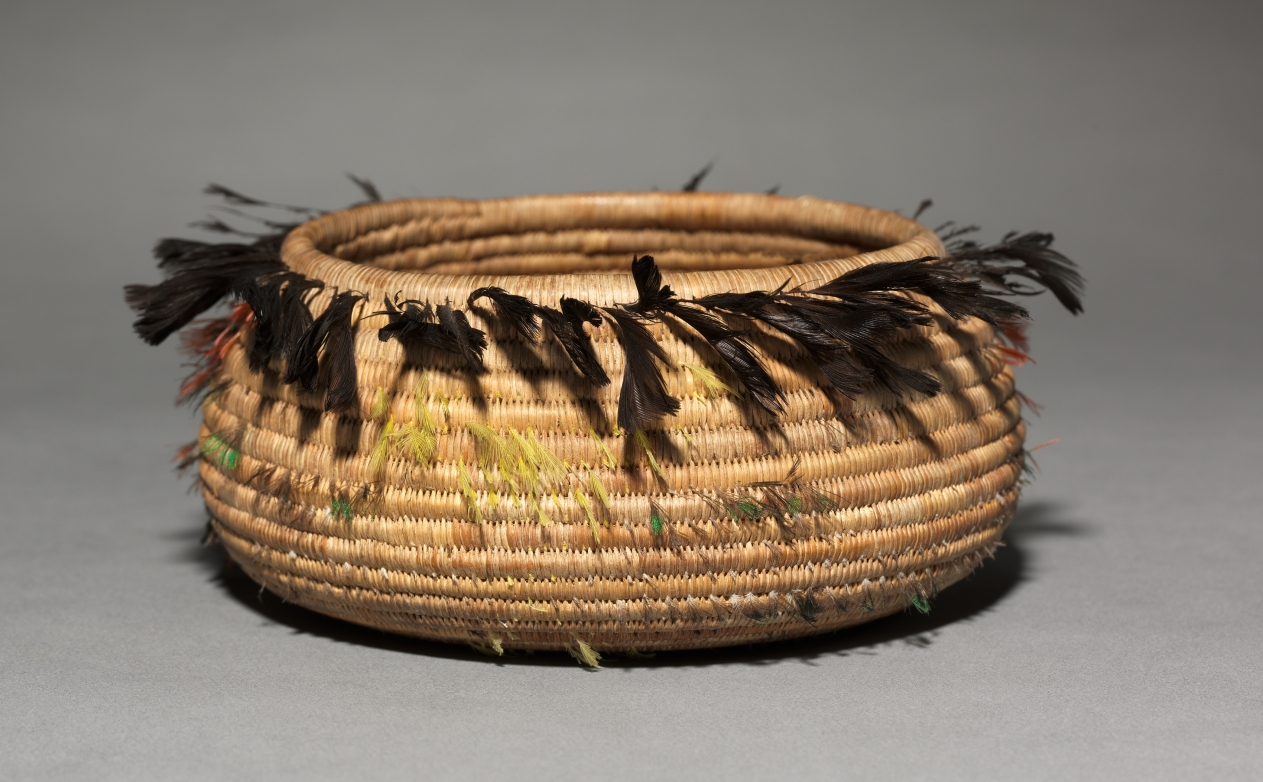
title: Gift Bowl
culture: California, Pomo, Eastern, Late 19th- Early 20th century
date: 1900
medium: Sedgw with Feathers; Coiled (3 rods)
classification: Basketry